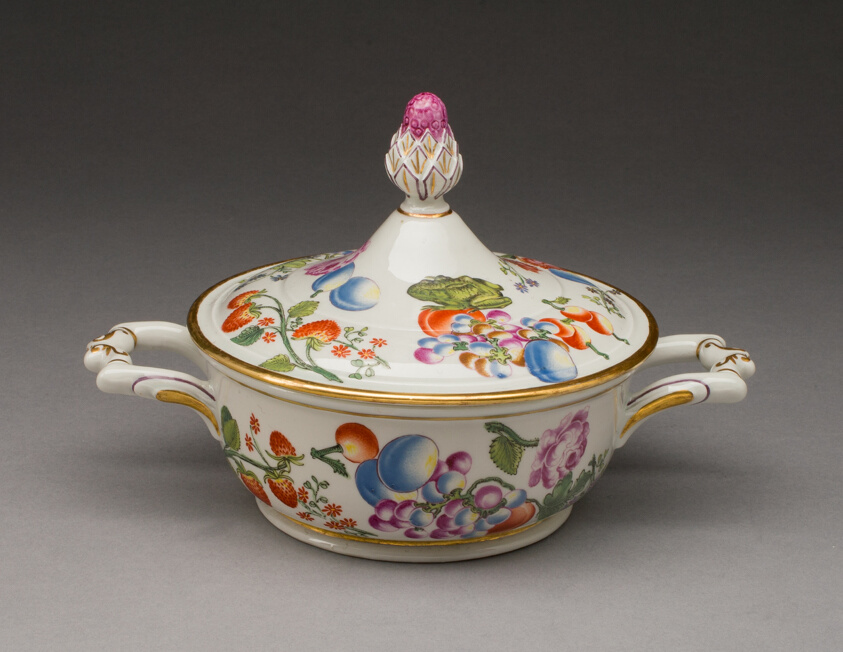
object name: Ceramics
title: Covered Bowl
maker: Du Paquier Porcelain Manufactory (Austrian, 1718-1744)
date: c. 1735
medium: Hard-paste porcelain, polychrome enamels, and gilding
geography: Vienna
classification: bowl; tableware; dish (vessel); ceramics; porcelain; european decorative arts